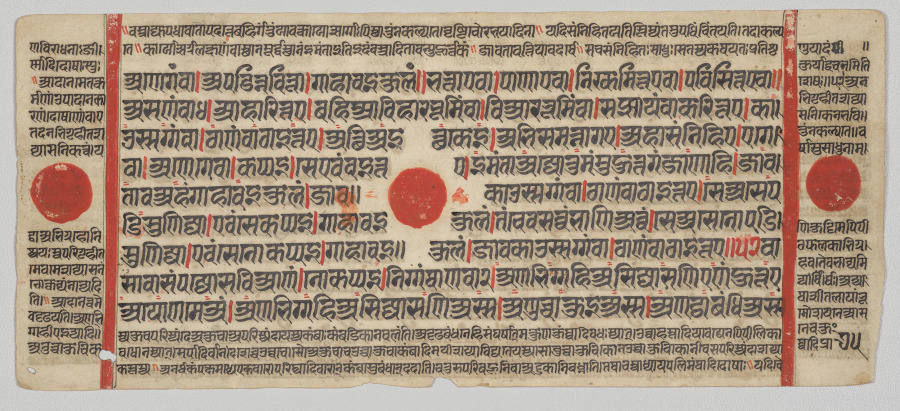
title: Text, Folio 75 (verso), from a Kalpa-sutra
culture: Western India, Gujarat, last quarter of the 15th century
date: c. 1475–1500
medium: Gum tempera, ink, and gold on paper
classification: Painting